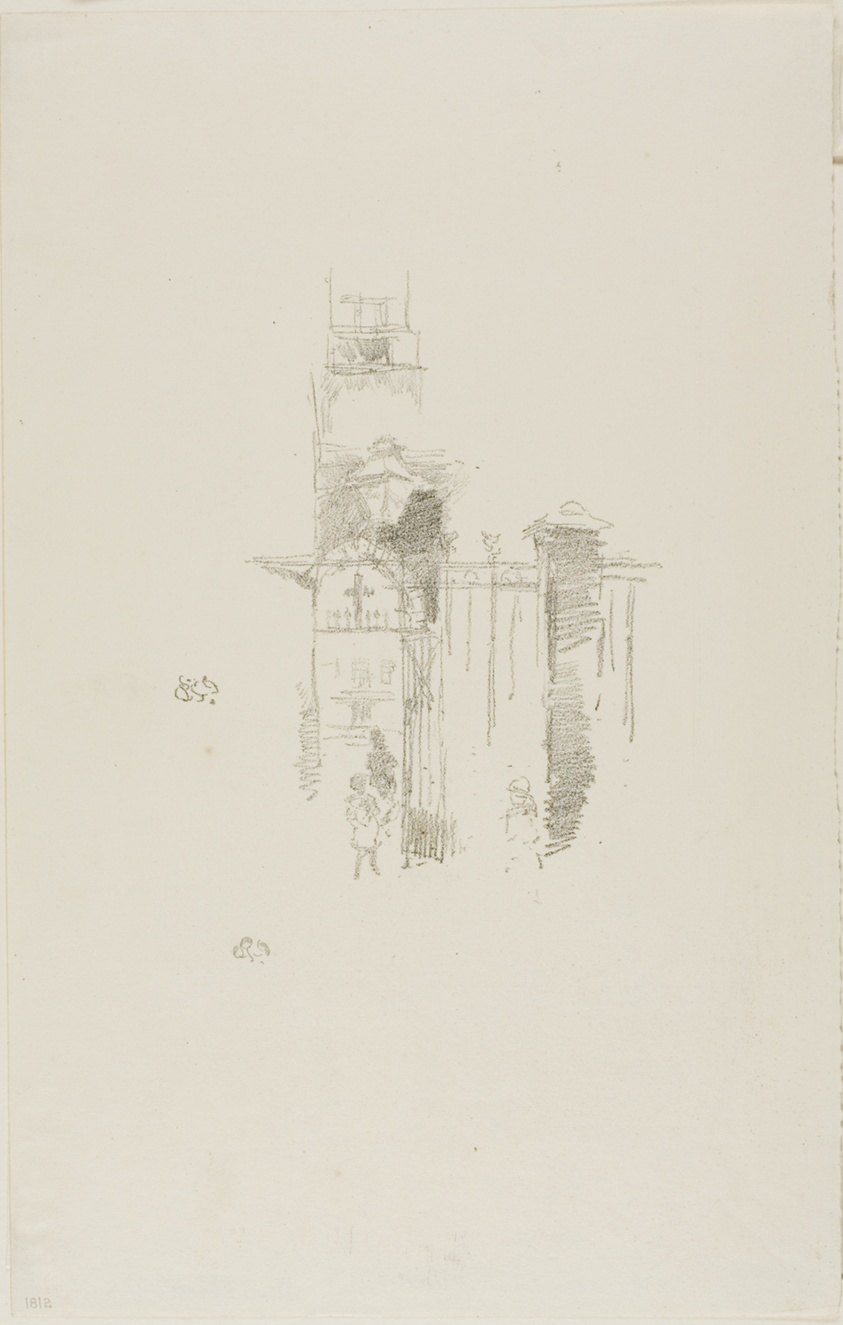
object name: Print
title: Entrance Gate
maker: James McNeill Whistler (American, 1834-1903)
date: 1887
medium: Transfer lithograph in black on ivory wove paper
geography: United States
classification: transfer lithograph; lithograph; print; prints and drawing; paper